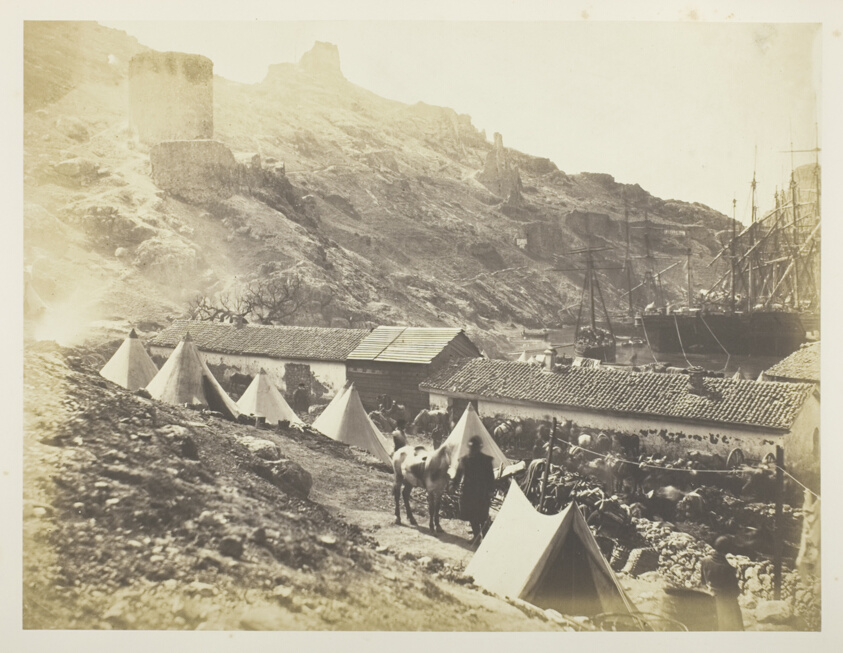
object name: Photograph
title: The Genoese Castle, Balaklava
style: 19th century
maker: Roger Fenton (English, 1819–1869)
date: 1855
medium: Salted paper print, plate 12 from the album "Photographs Taken in the Crimea" (1856)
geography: England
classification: salted paper print; photographic process; photography; photograph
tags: Collected by Hugh Edwards, Crimea 1856